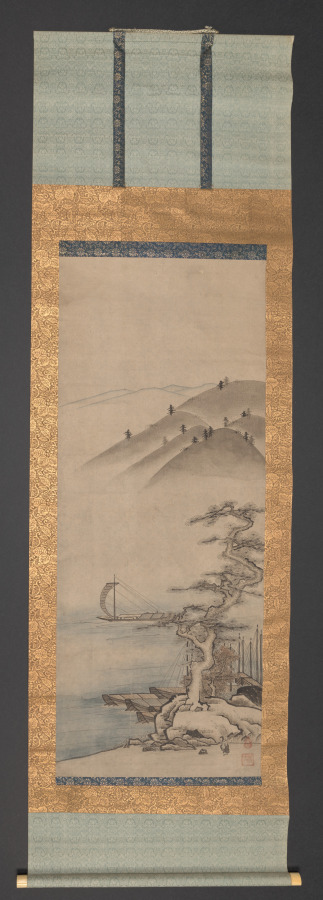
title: Landscapes (one of a pair)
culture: Japan, Edo period (1615–1868)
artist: Unkoku Tōyo (Japanese, 1612–1688?)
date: mid- to late 1600s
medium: hanging scroll; ink and light color on paper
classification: Painting